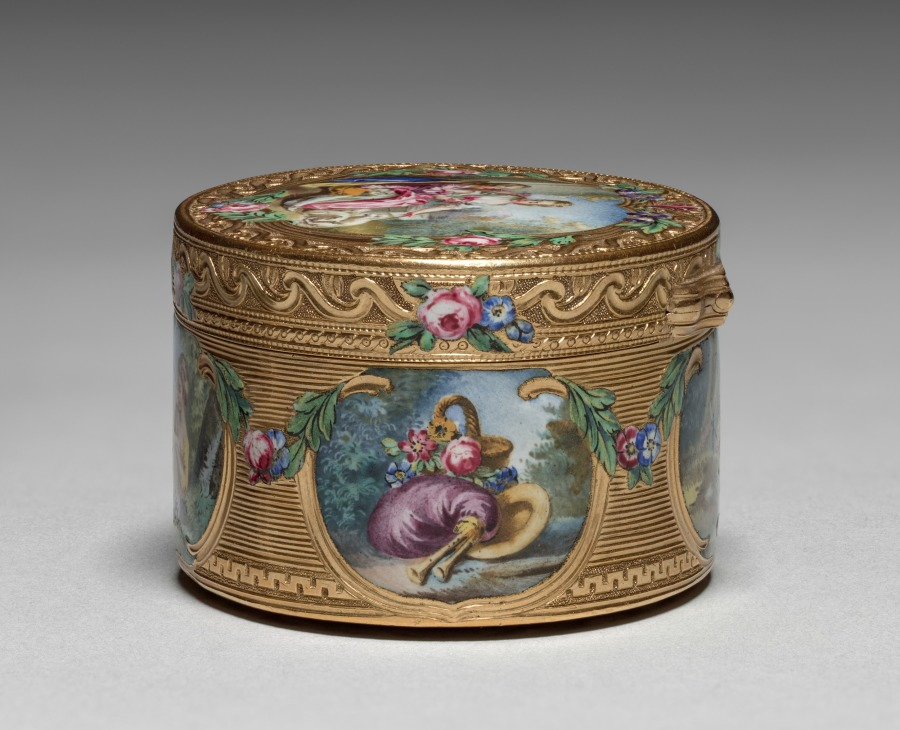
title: Snuff Box (Tabatière)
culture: France, 18th century (style of Louis XV)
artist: Francois Guillaume Tiron (French)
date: 1761–62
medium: gold and enamel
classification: Miscellaneous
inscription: [Maker's mark of Francois-Guillaume Tiron, master goldsmith in 1747, inside cover]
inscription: [Warden's mark, Paris, 1761-1762, inside cover]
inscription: [Charge mark of Eloi Brichard and Etienne Somfoye, Paris, 1756-1762, inside cover]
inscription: [Maker's mark of Francois-Guillaume Tiron, inside bottom]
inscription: [Warden's mark, 1761-1762, inside bottom]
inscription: [Charge mark of Brichard and Somfoye, inside bottom]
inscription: [Maker's mark of FG Tiron, left wall]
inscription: [Charge mark of Brichard and Somfoye, left wall]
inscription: [Warden's mark, Paris, 1761-1762, left wall]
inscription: [Discharge mark of J.J. Prevost, Paris, 1762-1768, bezel at right]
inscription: [Engraved number, maybe retailer's number]: "n. 13676"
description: The pastoral scenes that decorate this box are typical of the style of François Boucher, a celebrated painter of the period whose works were popularly reproduced on decorative arts. Snuff boxes, used practically as containers for powdered tobacco, were often decorated with miniature reproductions of notable works. The miniature on the cover is inspired by Boucher’s The Galant Pastor (Le Pasteur Gallant) (1738) and that on the bottom by The Amusement of the Shepherd Girl (L’Amusement de la Bergère) (1700s).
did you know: François Boucher was a favorite of the French royal court of Louis XV and named first painter of the king in 1765.